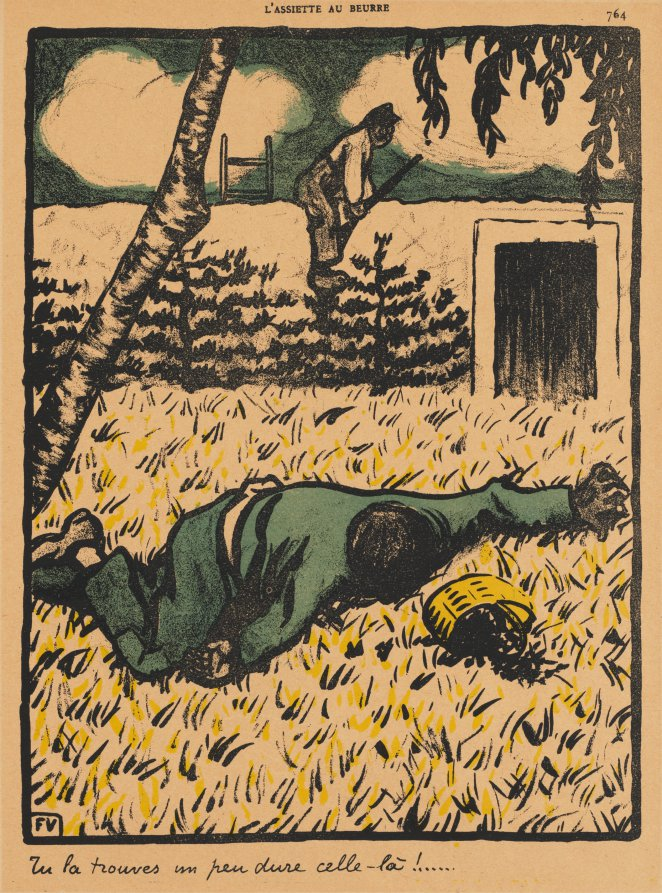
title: You'll find that's rather a hard one !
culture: France, 19th century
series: Crimes and Punishments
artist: Félix Vallotton (Swiss French, 1865–1925)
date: 1901, published 1902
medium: color lithograph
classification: Print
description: This print was published in the magazine L’Assiette au Beurre (March 1, 1902 ) as plate 7 from the series Crimes and Punishments.